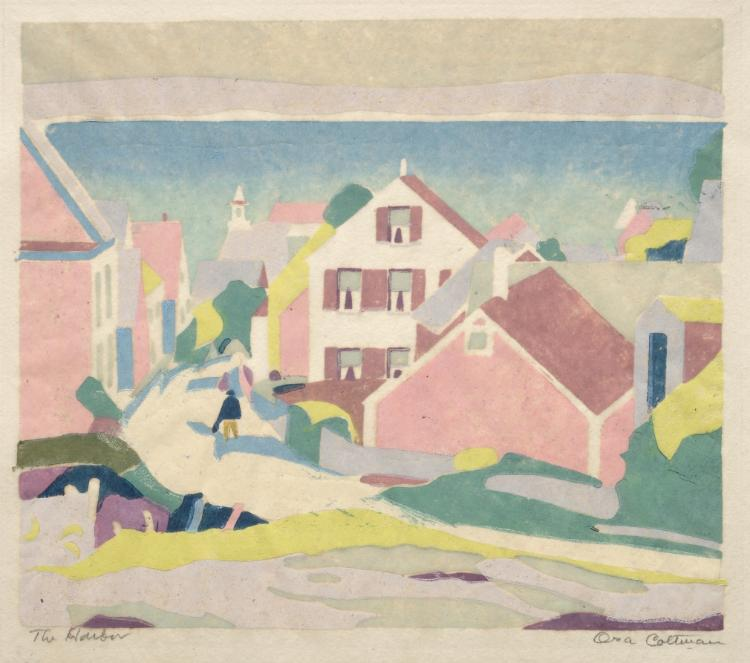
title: The Harbor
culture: America, Ohio, Cleveland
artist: Ora Coltman (American, 1858–1940)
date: 1928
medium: linoleum cut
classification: Print